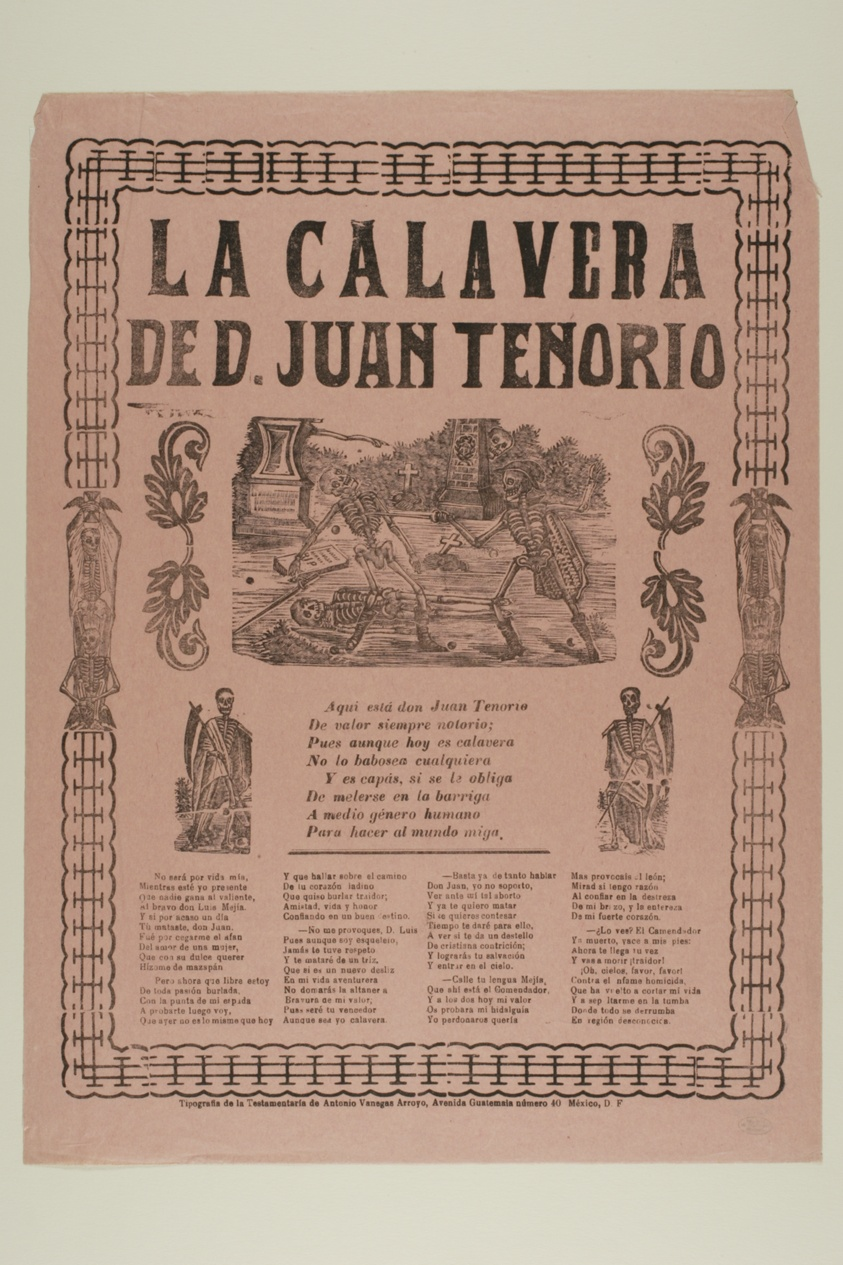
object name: Print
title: La Calavera de D. Juan Tenorio (The Calavera of D. Juan Tenorio)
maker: Manuel Manilla (Mexican, 1830-c.1900)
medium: Relief print on paper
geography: Mexico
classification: relief etching; print; prints and drawing